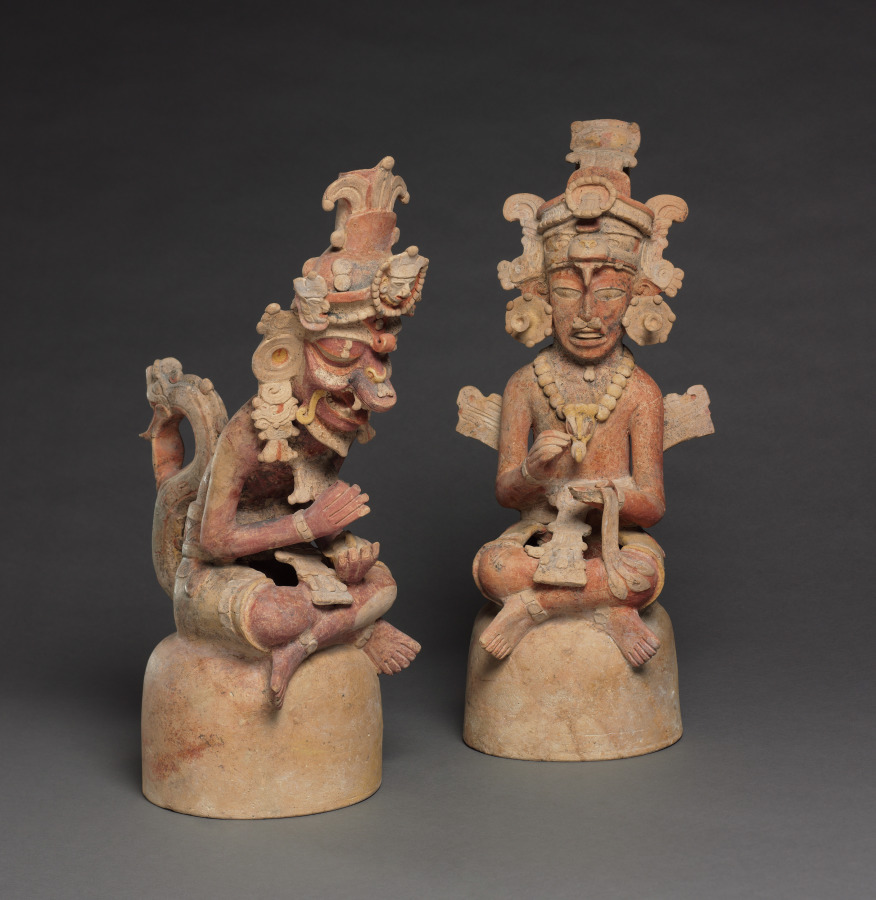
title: Two Artisans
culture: Guatemala, Petén region, Maya style (250-900), Maya style (250-900)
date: 250–600 CE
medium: earthenware with colored slips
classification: Sculpture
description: These figures represent the supernatural patrons of the visual arts and writing: the brothers Hun Batz and Hun Chuen ("One Monkey" and "One Artisan"). The two were refined artists but also bullies who tormented their younger brothers, who took revenge by transforming their elders into monkeys. Many Maya representations of the painter-scribes immortalize this fate by depicting the pair with both simian and human features, as here. The brothers are shown engaged in artistic or scribal pursuits. Sitting on high-domed bases that may have served as the lids of incense or offering bowls, each apparently once grasped a tool in his upper hand—for instance, a paint brush or a stylus for writing. In the lower hand, one cradles a small mask and the other, a piece of bark that likely refers to the beaten bark from which the Maya made books.